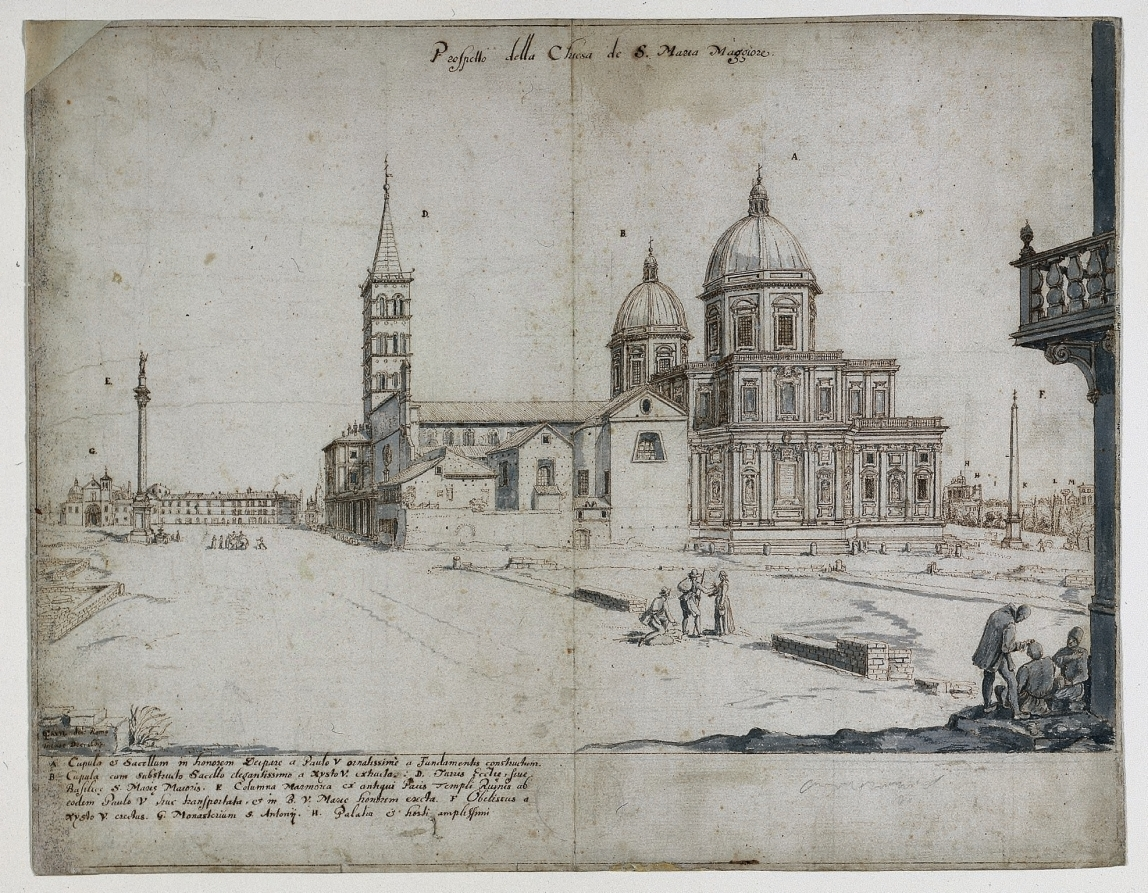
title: Eighteen Views of Rome: The Basilica of Santa Maria Maggiore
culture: Flanders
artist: Lievin Cruyl (Flemish, c. 1640-c. 1720)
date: 1664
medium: pen and brown ink and brush and gray wash over stylus and graphite; framing lines in brown ink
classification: Drawing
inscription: signed, lower left, in brown ink: [artist's monogram: LC] RVYL del: Romæ / mense Dec: 1664. ; by artist, upper center, in brown ink: Prospetto della Chiesa de S. Maria Maggiore. ; by artist, throughout composition, in brown ink: [the letters A-M] ; by artist, lower left, in brown ink: A Cupula et Sacellum in honorem Deiparæ a Paulo V ornatissimè a Fundamentis constructium. / B Cupula cum substructo Sacello elegantissimo a Xysto V. extructa. . D. Turris Eccliæ, sive / Basilicæ S. Mariæ Maioris. E Columna marmorea ex antiqui Pacis Templi Ruinis ab / eodem Paulo V huc transportata, es in B. V. Mariæ honorem erecta. F Obelistus a / Xÿsto V. erectus. G. Monasterium S. Antonij. H. Palatia et hosti amplissimi ; lower right, in graphite: [illegible] ; VERSO, upper left, in brown ink: [illegible]5 ; ON STRIPS OF PAPER MOUNTED TO VERSO, lower center, in graphite: A. 20973 ; lower right, in graphite: E .5